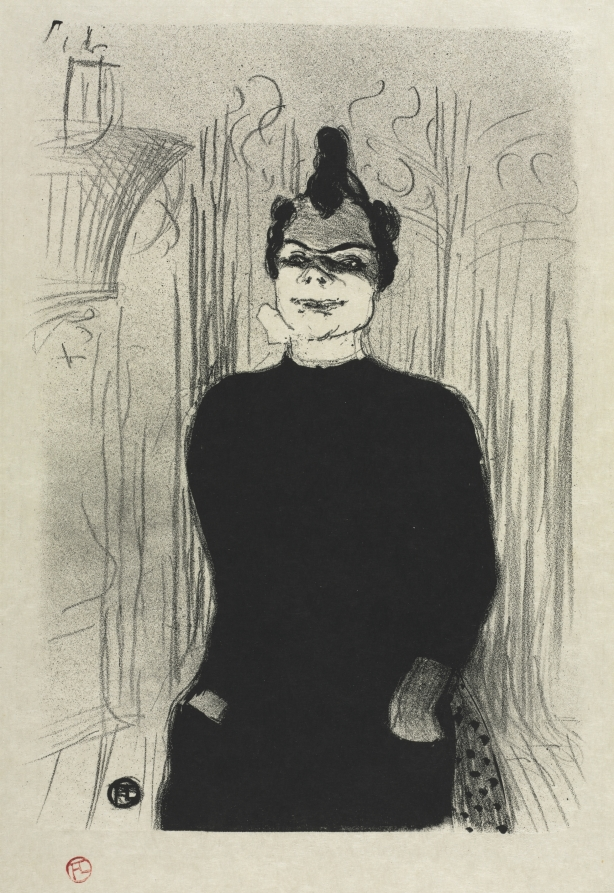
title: At the Gaieté Rochechouart: Nicolle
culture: France, 19th century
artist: Henri de Toulouse-Lautrec (French, 1864–1901)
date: 1893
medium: lithograph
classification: Print